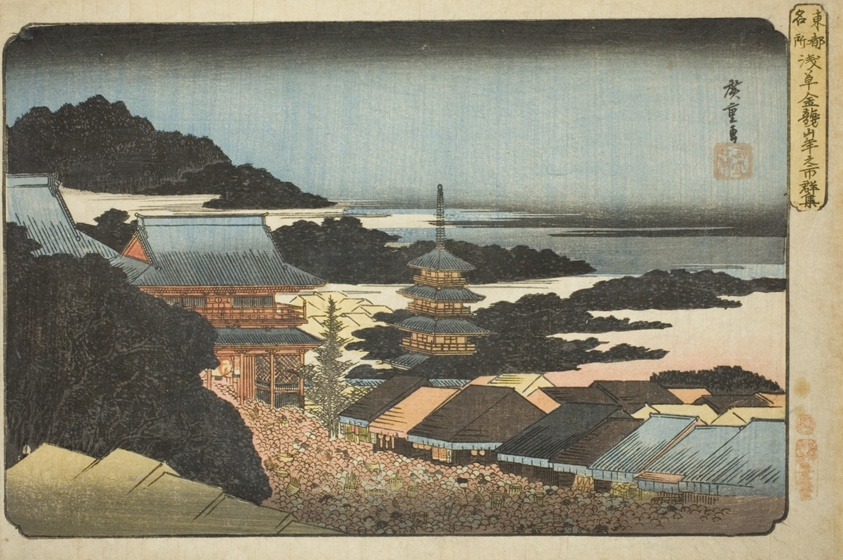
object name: Print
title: Crowds at the Year-end Fair at Kinryuzan Temple in Asakusa (Asakusa Kinryuzan toshi no ichi gunshu), from the series "Famous Places in the Eastern Capital (Toto meisho)"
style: Japanese (culture or style)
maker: Utagawa Hiroshige 歌川 広重; Japanese, 1797-1858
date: c. 1832/38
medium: Color woodblock print; oban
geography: Japan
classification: woodblock print; print; asian art